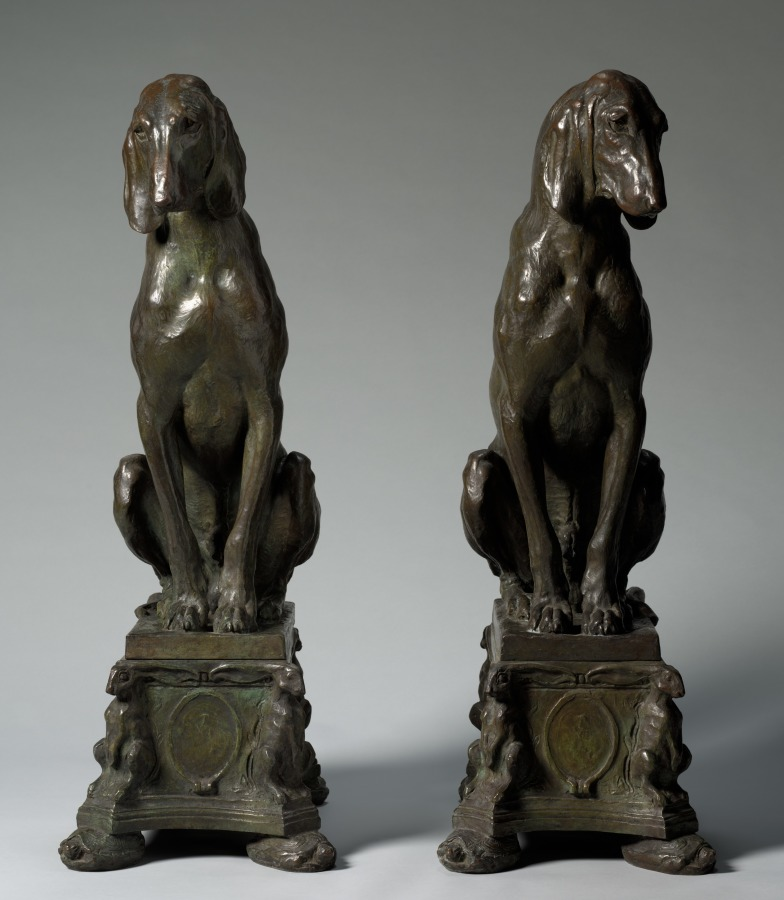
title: Pair of Hounds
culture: America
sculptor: Charles Cary Rumsey (American, 1879–1922)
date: 1912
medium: bronze andirons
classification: Sculpture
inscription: Signed on plinth: © C. C. Rumsey